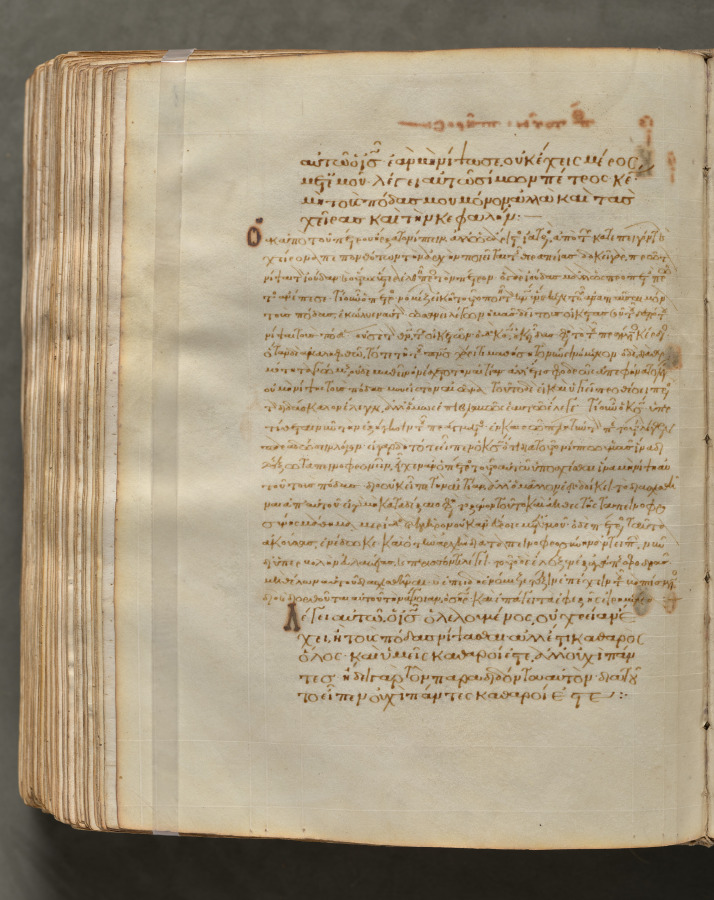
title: Text, folio 388 (verso), from a Gospel Book with Commentaries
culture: Byzantium, Constantinople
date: c. 1000–1100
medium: ink, tempera, and gold on vellum; leather binding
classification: Bound Volume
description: Each of the four gospels in this book opens on a page with brilliantly illuminated borders depicting the author of the text as well as birds—principally peacocks, symbols of the immortality of the soul—and fountains, representing the fountain of life and the salvation of the soul. This volume consists of 428 leaves with texts in Greek. Its level of sophistication suggests that it was probably written and decorated in a monastery in Constantinople.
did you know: Gospel books were carried in procession through Byzantine churches.